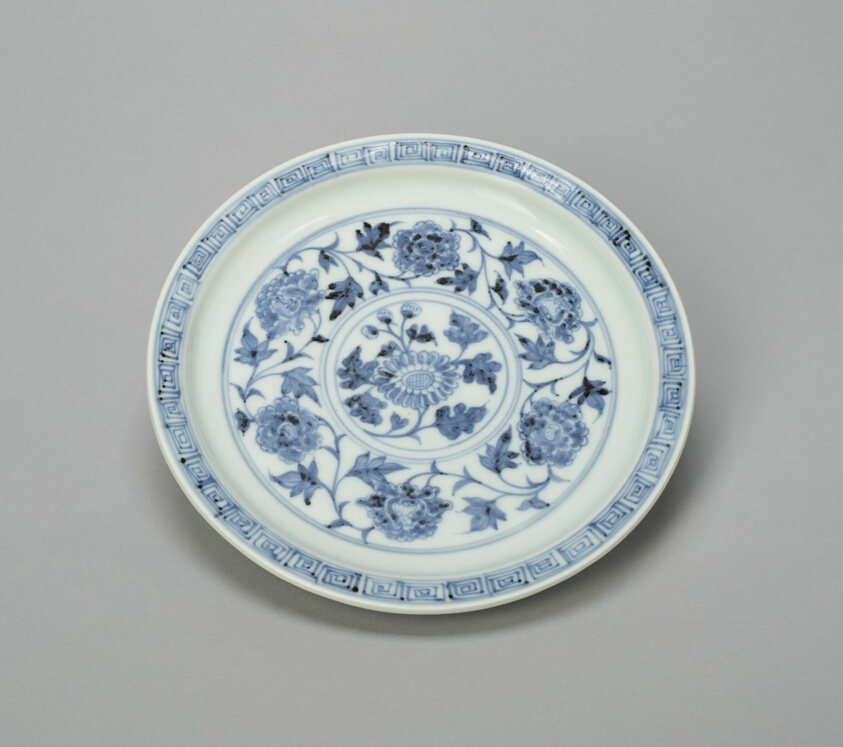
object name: Vessel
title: Dish with Peony Scrolls and Chrysanthemum Spray, and Lotus Panels on Reverse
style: Chinese (culture or style)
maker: China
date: Ming dynasty (1368–1644), Hongwu period (1368–98)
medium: Porcelain painted in underglaze blue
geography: China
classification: dish (vessel); porcelain; ceramics; asian art; vessel